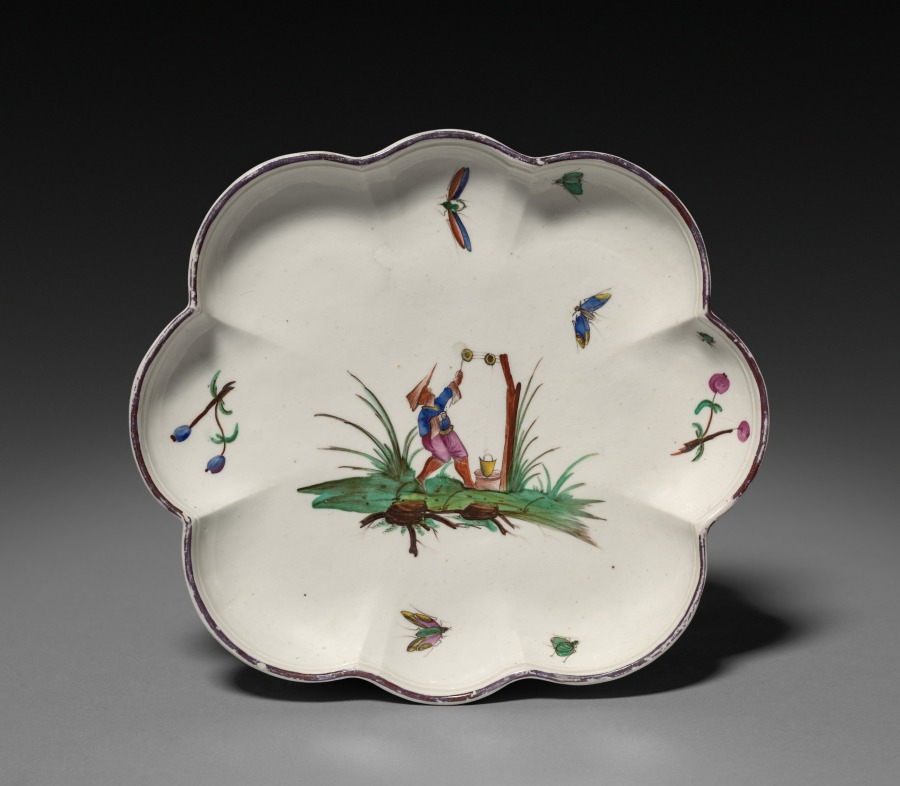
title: Dish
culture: France, Strasbourg, 18th century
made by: Strasbourg Factory (France)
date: 1771–1781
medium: porcelain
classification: Ceramic